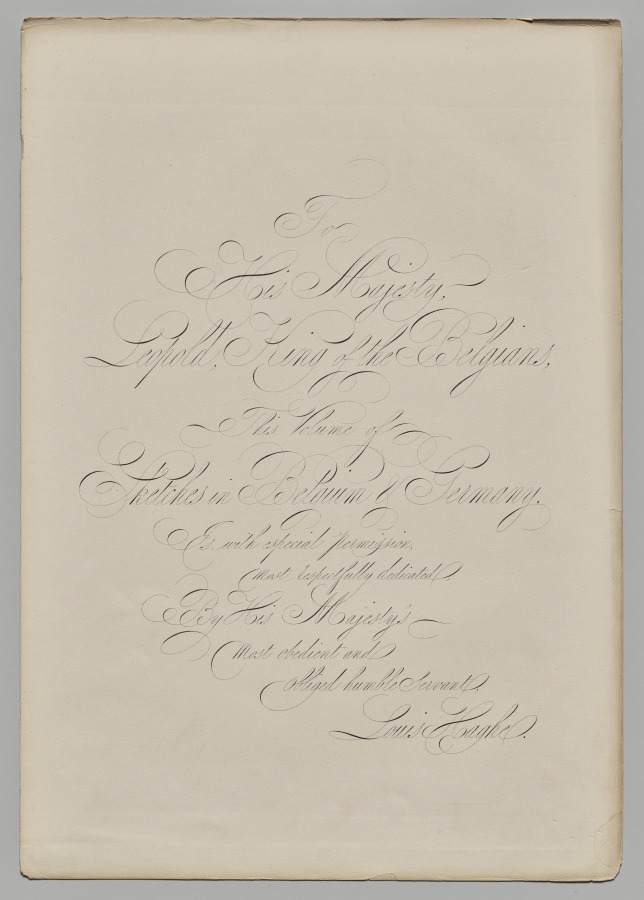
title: Sketches in Belgium and Germany, Second Series: No. 1 - Title Page - St. Jacques, Liege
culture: England, 19th century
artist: Louis Haghe (British, 1806–1885)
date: 1845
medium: lithograph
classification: Print